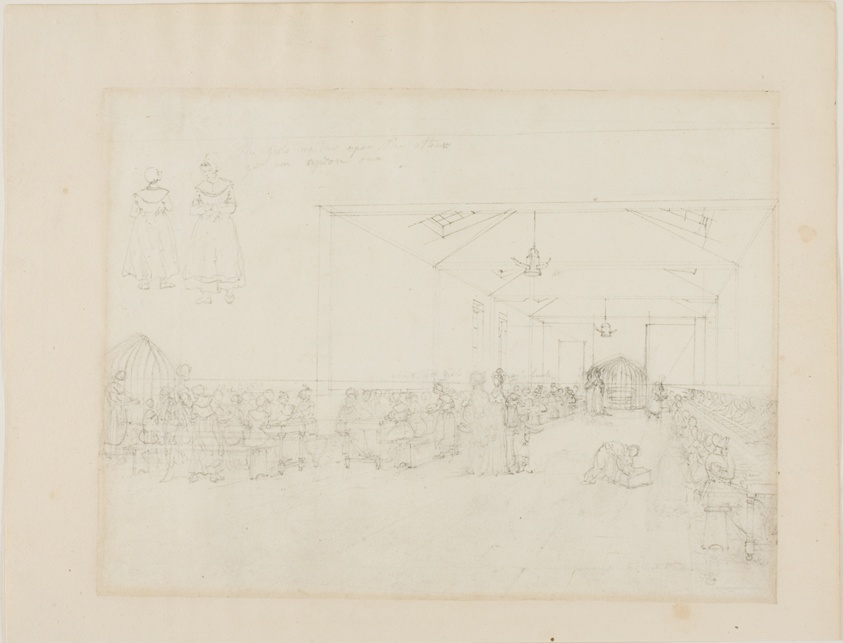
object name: Drawing and Watercolor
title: Study for Dining Hall, Asylum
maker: Augustus Charles Pugin (English, born France, 1762-1832); Thomas Rowlandson (English, 1756-1827)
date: c. 1808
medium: Graphite on ivory laid paper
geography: England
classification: graphite; drawings (visual works); prints and drawing